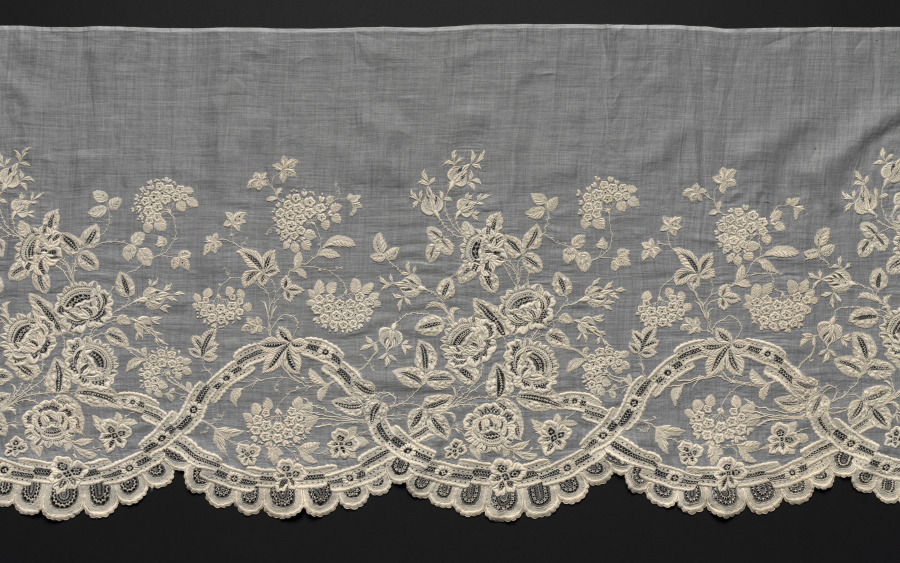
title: Flounce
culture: France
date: 1800–1820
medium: Plain weave cotton: embroidered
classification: Embroidery